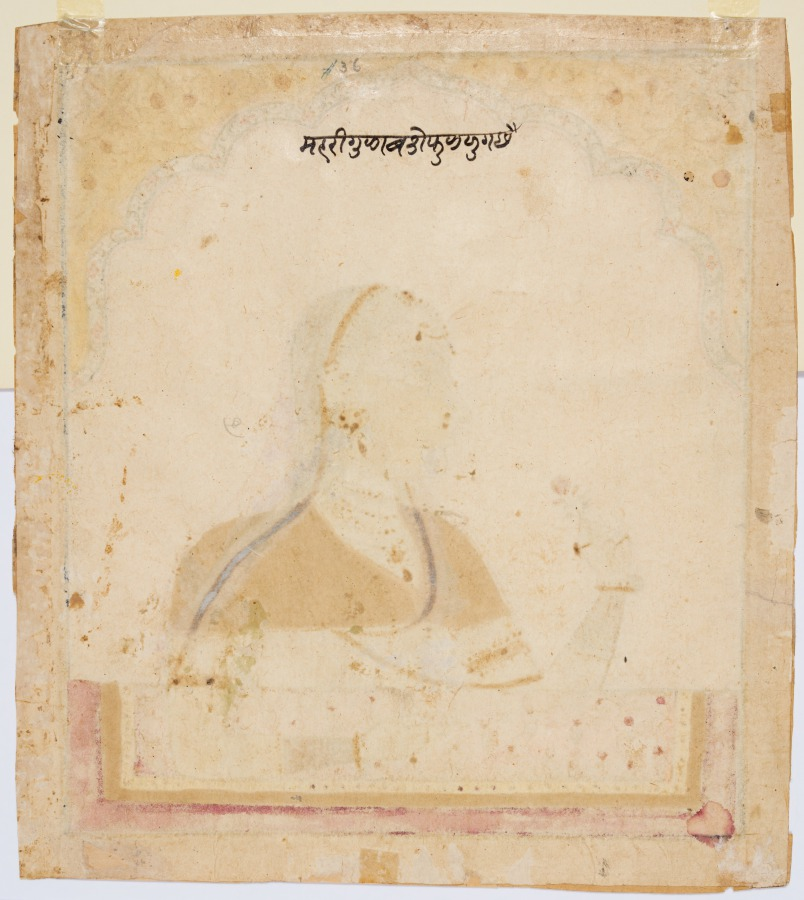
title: Noblewoman at a Jharokha Window Holding a Rose, from a Portraits of Women series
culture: Northwestern India, Rajasthan, Rajput Kingdom of Sawar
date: c. 1730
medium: gum tempera and gold on paper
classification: Painting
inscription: maharī gulāba kō phula lugachai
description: A royal woman stands on a palace balcony under a cusped arch. The carpet draped over the railing in front of her indicates to viewers that the person is a member of the royal family. The rulers of small kingdoms adopted the Mughal practice of locating the emperor in the jharokha window and expanded it to include other members of the royal household. They also adopted the Mughal taste for scalloped arches, swirling arabesque flowering-vine motifs, and images of flowering plants on the carpet. Her oversized eye emphasizes the importance of seeing and being seen.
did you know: The carpet is patterned with roses to match the flowers she holds.